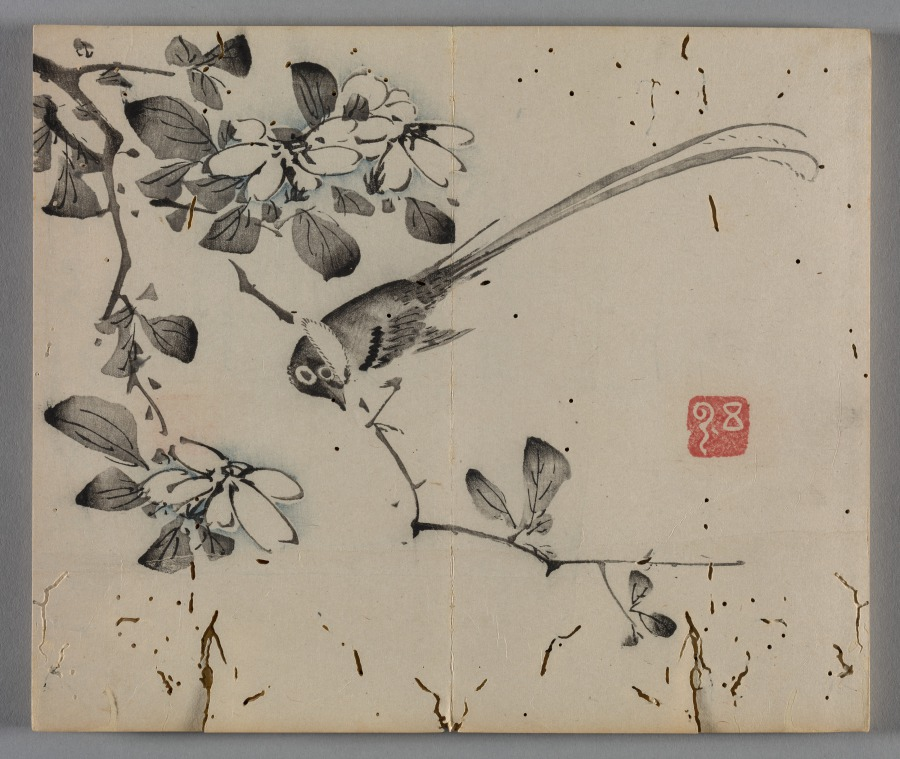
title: Ten Bamboo Studio Painting and Calligraphy Handbook (Shizhuzhai shuhua pu): Birds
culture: China, Qing dynasty (1644-1911)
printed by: Hu Zhengyan (Chinese, c. 1584–1674)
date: 1633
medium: Woodblock-printed book; ink and colors on paper; first edition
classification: Print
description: Color printing reached a level of perfection in the early 1600s, as seen in this Ten Bamboo Studio Collection of Calligraphy and Painting and the Mustard Seed Garden Manual of Painting (printed 1679 and 1701). The painterly quality, precision in registering (aligning) the woodblocks, and harmonious colors made them the most successful color print editions in Chinese history. Both editions were printed and compiled in Nanjing, spread nationwide, and had a great impact on the arts in Japan and Korea.